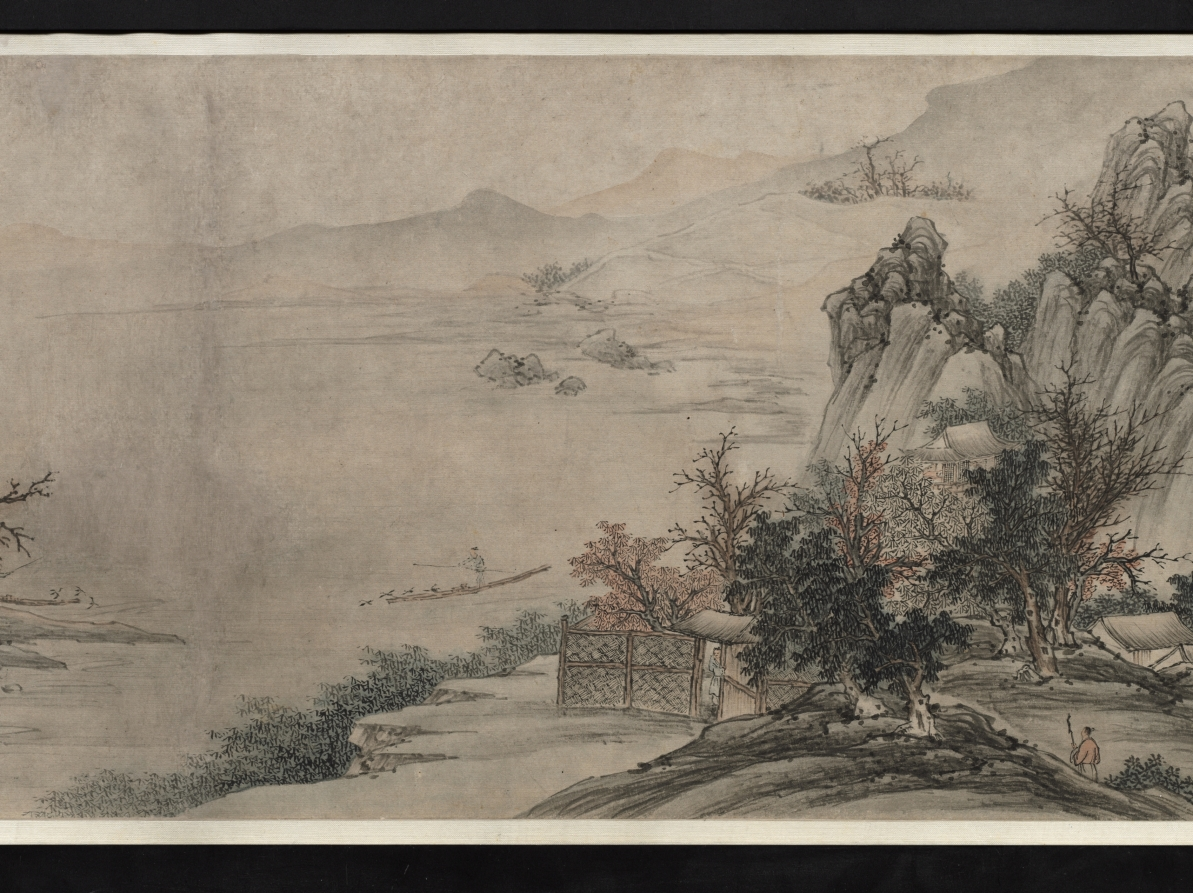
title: Autumn Mist in the Countryside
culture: China, Qing dynasty (1644-1911)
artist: Zou Zhe (Chinese, c. 1610-before 1688)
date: 1647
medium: handscroll, ink and color on paper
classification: Painting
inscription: Artist's inscription, signature, and seal: The first day of the sixth lunar month, the ting-hai year [1647], Tsou Che painted [this]. [seal] Fang-lu.